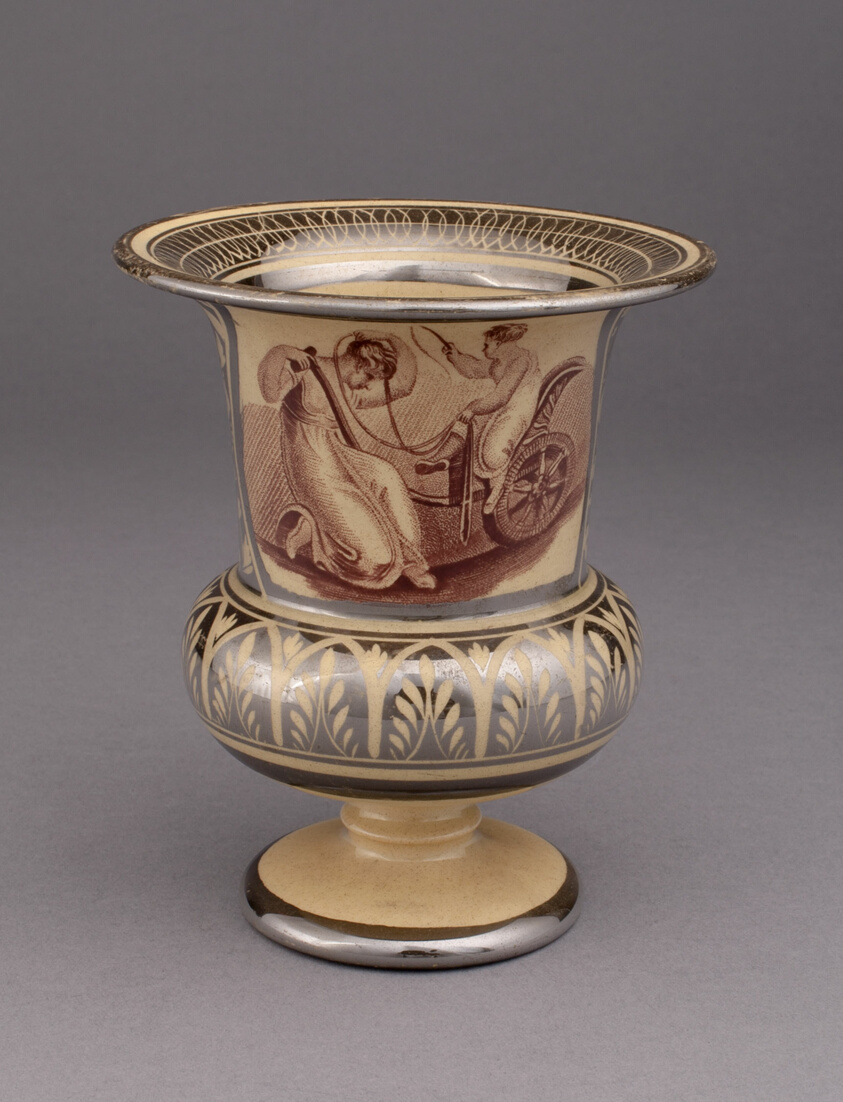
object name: Ceramics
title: Vase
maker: England, Leeds; With Transfer Decoration after Adam Buck; Irish, 1759-1833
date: c. 1820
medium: Earthenware with silver lustre decoration, monochrome brown, and yellow ground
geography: Leeds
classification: vase; vessel; ceramics; european decorative arts; earthenware